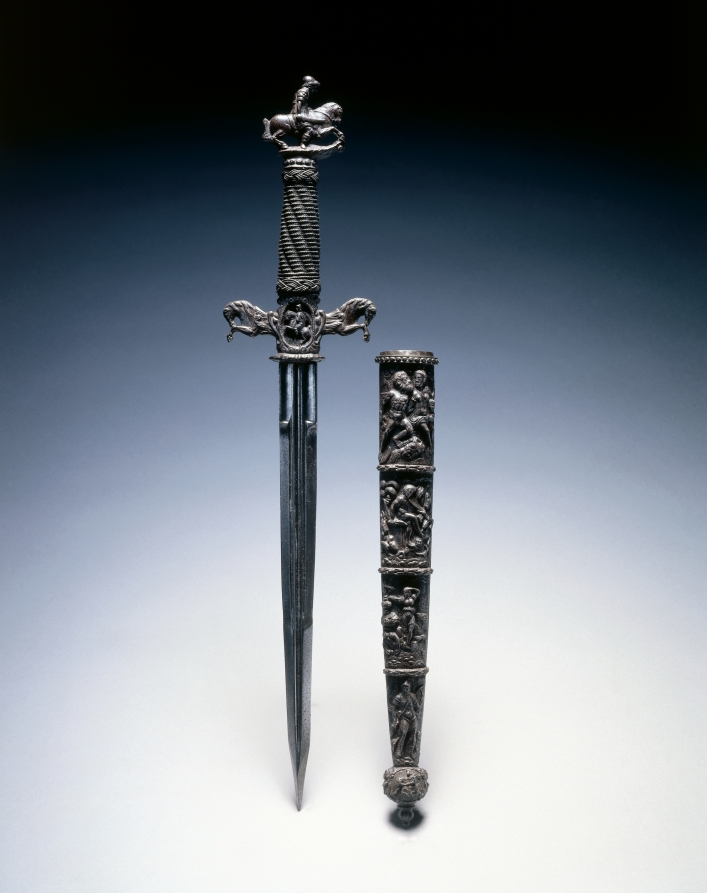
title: Dagger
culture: Switzerland and/or France, 17th century (16th century blade)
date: 1600s (1500s blade)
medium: steel and wire; chiseled quillions and pommel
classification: Arms and Armor